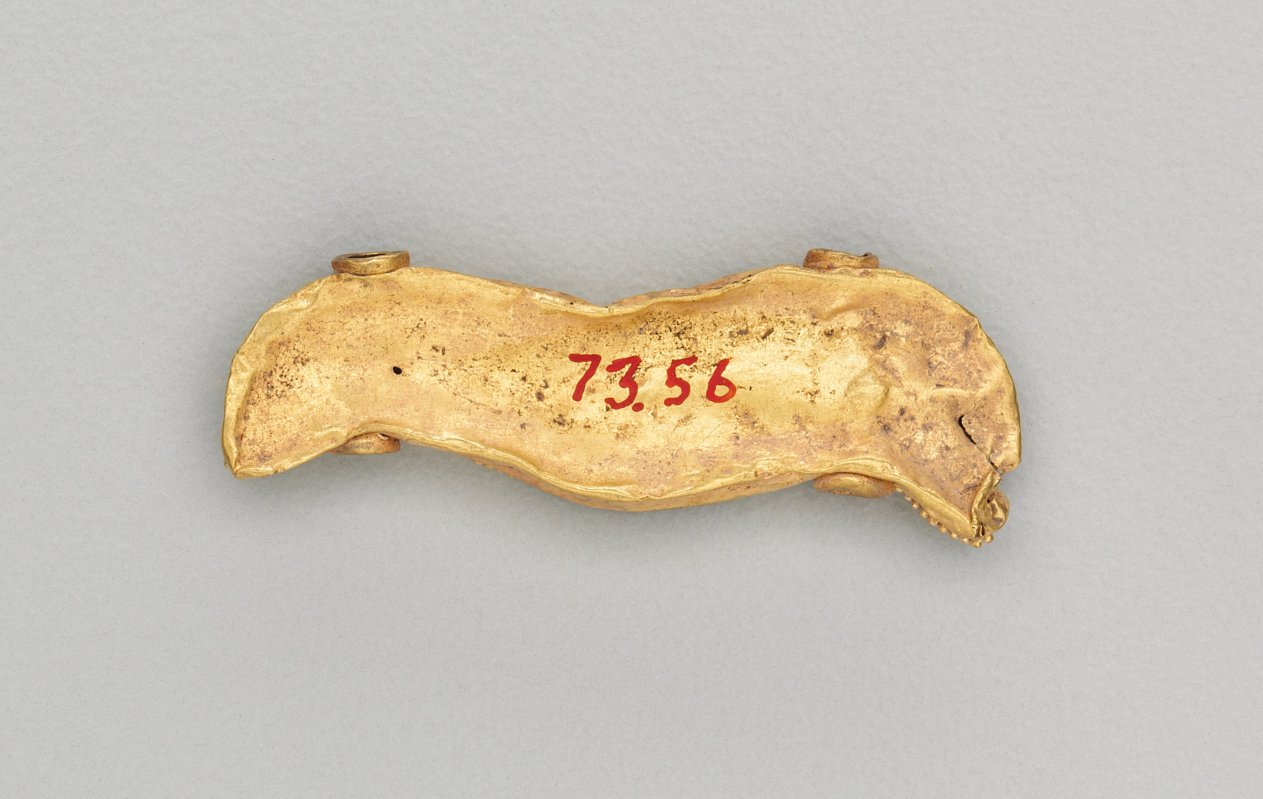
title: Set of Pendants Ending in a Bull's Head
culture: India, Shunga period (185–78 BCE)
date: 185–72 BCE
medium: gold repoussé with granulation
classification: Jewelry